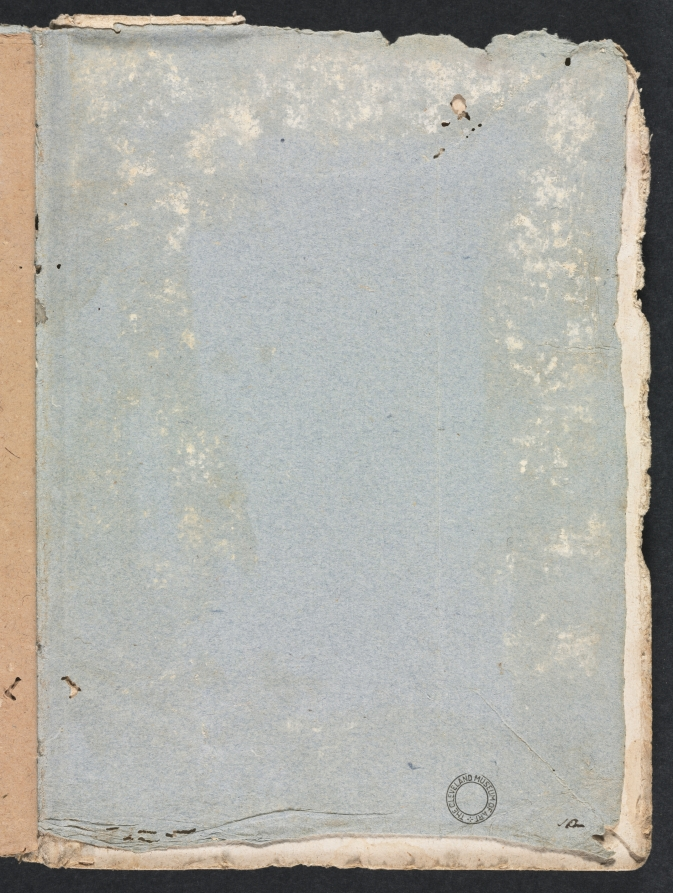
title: Verona Sketchbook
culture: Italy, 18th century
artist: Francesco Lorenzi (Italian, 1723–1787)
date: 1760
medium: chalk drawing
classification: Bound Volume